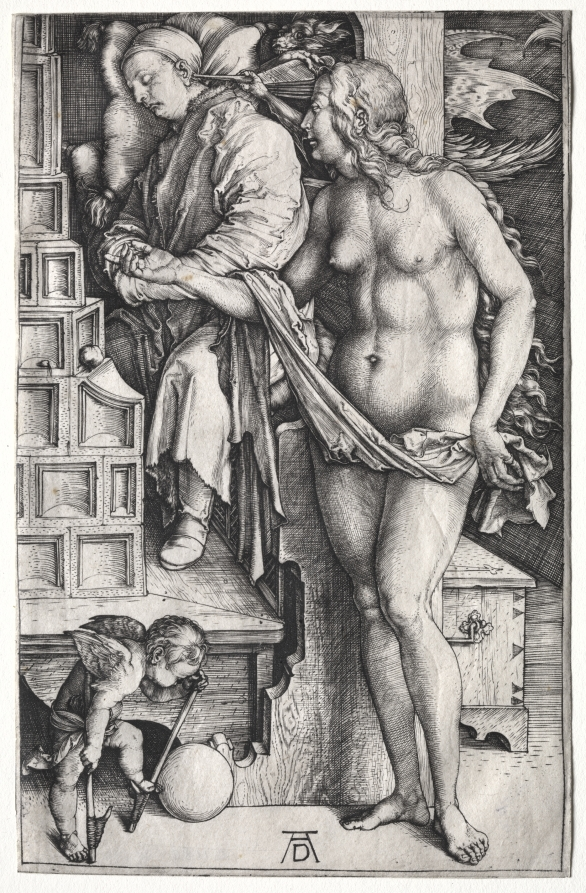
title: The Dream of the Doctor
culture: Germany, late 15th-early 16th Century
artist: Albrecht Dürer (German, 1471–1528)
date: c. 1500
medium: engraving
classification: Print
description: Scholars generally agree that this curious engraving represents the contemporary proverb "Idling is the pillow of the devil," a moral message against the sin of sloth. Here, a middle-aged scholar dozes before a warm stove. The devil hovers behind him and uses a fireplace bellows to kindle impure desires. Aroused by the devil’s sinful provocation, the scholar’s subconscious conjures Venus, an object of lustful temptation. Dürer’s image explores the realm of dreams and innermost thought in association with powerful female sexuality. Like many of his other engravings of this early period, Dürer uses obscure, moralistic stories to consider the female nude both creatively and intellectually. Although aimed at a primarily cultured male audience, Dürer presents Venus as a source of desire not only for the sinful idler, but for the viewer as well.